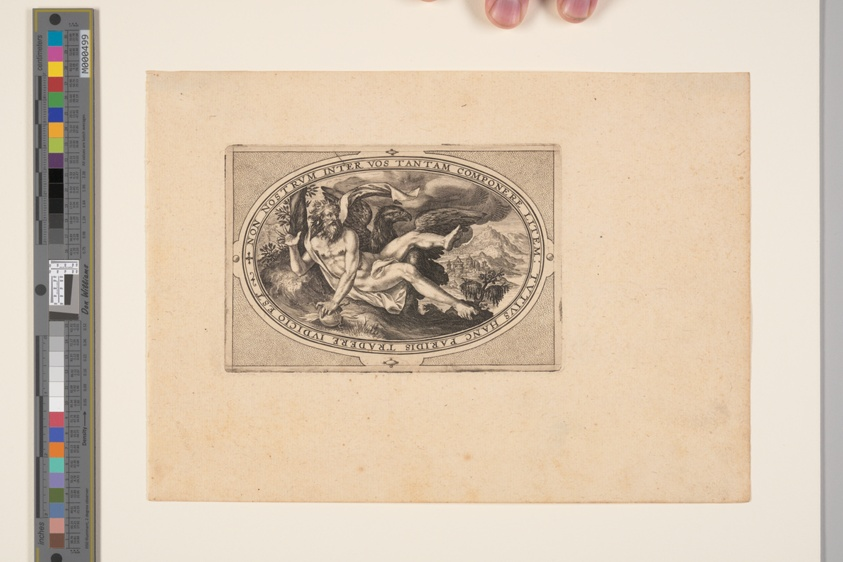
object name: Print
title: Jupiter, from Gods and Goddesses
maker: Crispijn van de Passe I; Dutch, c. 1565–1637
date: 1592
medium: Engraving on paper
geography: Netherlands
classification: engraving; paper; print; prints and drawing